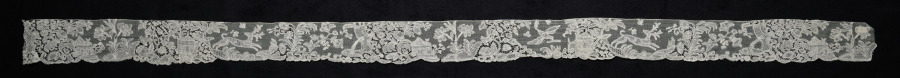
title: Lace Edging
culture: Belgium, Brussels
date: 1700s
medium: Linen: bobbin lace (Point d'Angleterre)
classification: Lace